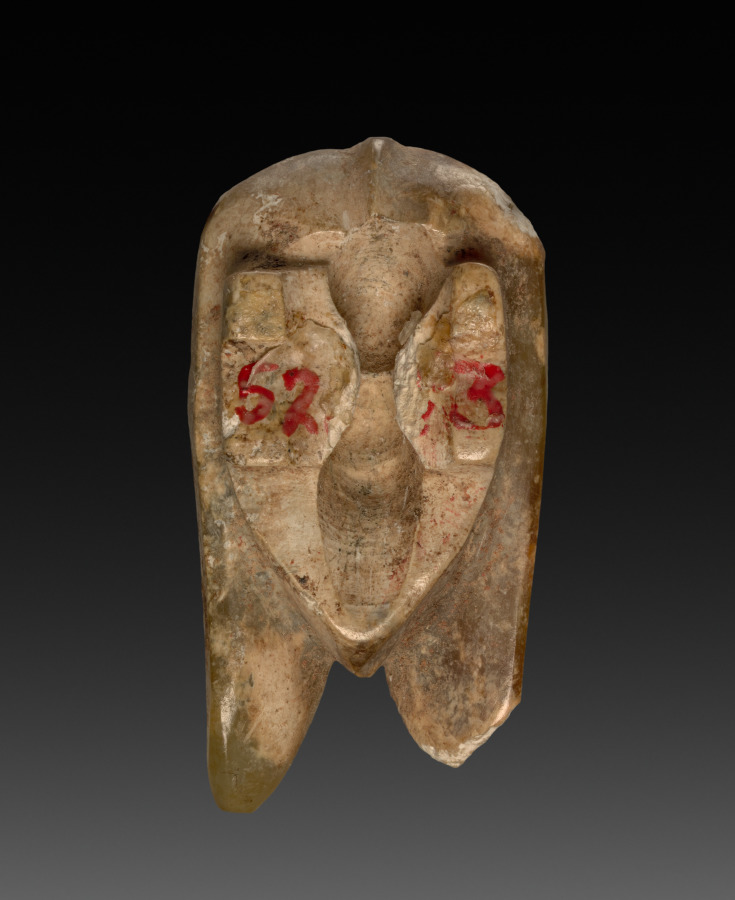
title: Cicada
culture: China, Zhou dynasty (c. 1046–256 BCE)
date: 1100–1000 BCE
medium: jade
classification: Jade